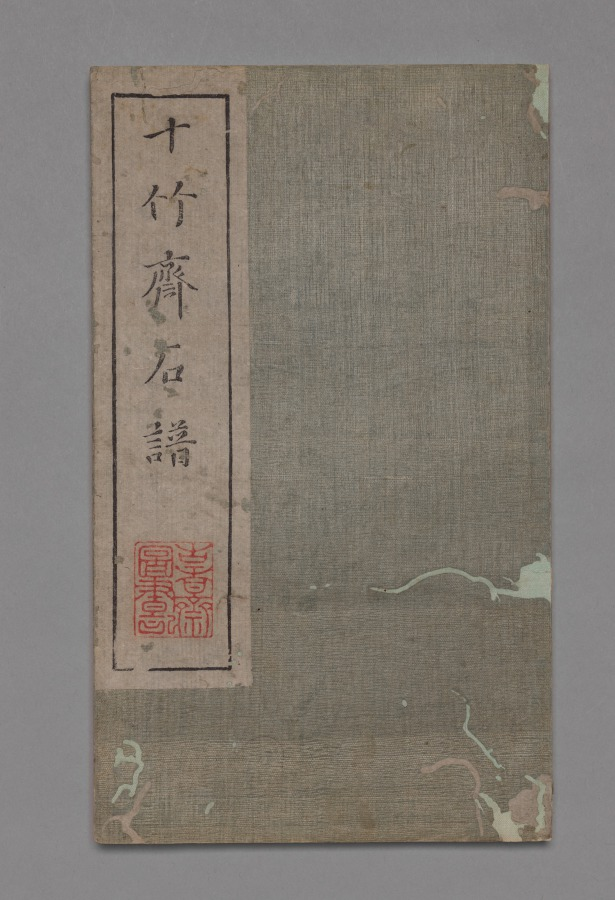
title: Ten Bamboo Studio Painting and Calligraphy Handbook (Shizhuzhai shuhua pu): Rocks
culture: China, Qing dynasty (1644-1911)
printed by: Hu Zhengyan (Chinese, c. 1584–1674)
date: 1633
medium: Woodblock-printed book; ink and colors on paper; first edition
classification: Print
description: Color printing reached a level of perfection in the early 1600s, as seen in this Ten Bamboo Studio Collection of Calligraphy and Painting and the Mustard Seed Garden Manual of Painting (printed 1679 and 1701). The painterly quality, precision in registering (aligning) the woodblocks, and harmonious colors made them the most successful color print editions in Chinese history. Both editions were printed and compiled in Nanjing, spread nationwide, and had a great impact on the arts in Japan and Korea.